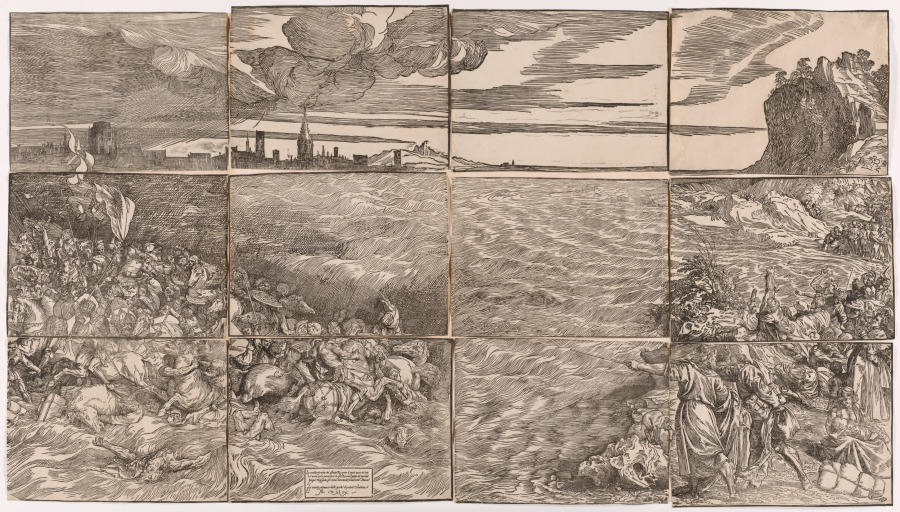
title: The Submersion of Pharaoh's Army in the Red Sea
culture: Italy, Venice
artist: Titian (Italian, c. 1488–1576)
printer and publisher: Domenico dalle Greche (Italian, 1503–1603)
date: 1514–15, printed 1549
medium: woodcut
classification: Print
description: This composition is made up of 12 separately printed woodcuts to create one image in grand scale. The size rivals that of a history painting, and, unlike most prints, the composition would have been hung on the wall. This is confirmed by the lack of complete impressions from the date of the print's creation—around 1515. This and all extant impressions date from a later edition, published in 1549 by the publisher Domenico dalle Greche (Italian, active 1543–1558). The woodcut is based on a drawing by the Venetian master Titian, and the bold, expressive, and irregular marks of the woodcutter imitate his drawing manner. The narrative—that of the Israelites’ persecution under the Egyptian pharaoh and his army’s fate when they followed Moses into the Red Sea—is propelled across the 12 sheets with remarkable unity. The rolling clouds and turbulent sea culminate in the solid gravity of the magnificent cliff that overhangs the shore.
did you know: Titian may have identified the Egyptians in this composition, drowned in the Red Sea as they pursue the fleeing Israelites, with the League of Cambrai, a military alliance formed by the major powers in southern Europe and a menace to his hometown of Venice.